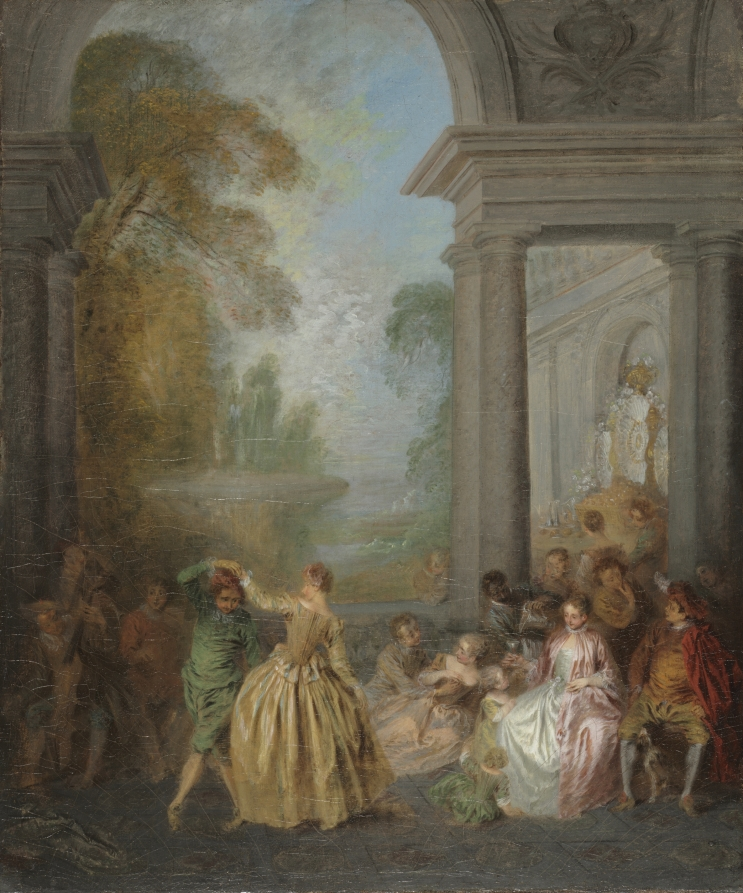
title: Dancers in a Pavilion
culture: France, 18th century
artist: Jean-Baptiste Pater (French, 1695–1736)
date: 1720s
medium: oil on canvas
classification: Painting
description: Jean-Baptiste Pater was the sole student of the early 18th-century artist Antoine Watteau (1684–1721). Upon Watteau's death, Pater finished some of his teacher's compositions and copied them for reproduction. Due to this association, Pater was in the position to capitalize on the popularity of the fête galante genre invented by Watteau. This genre was based on the fêtes held by the aristocracy to escape the tedium of life at the French court, and depict the same amusements: conversation, music, dance, and the pursuit of love. Dancers in a Pavilion is a pastiche of several works by Watteau. The couple in this painting is most likely performing the minuet, which was considered the most flirtatious of dances.